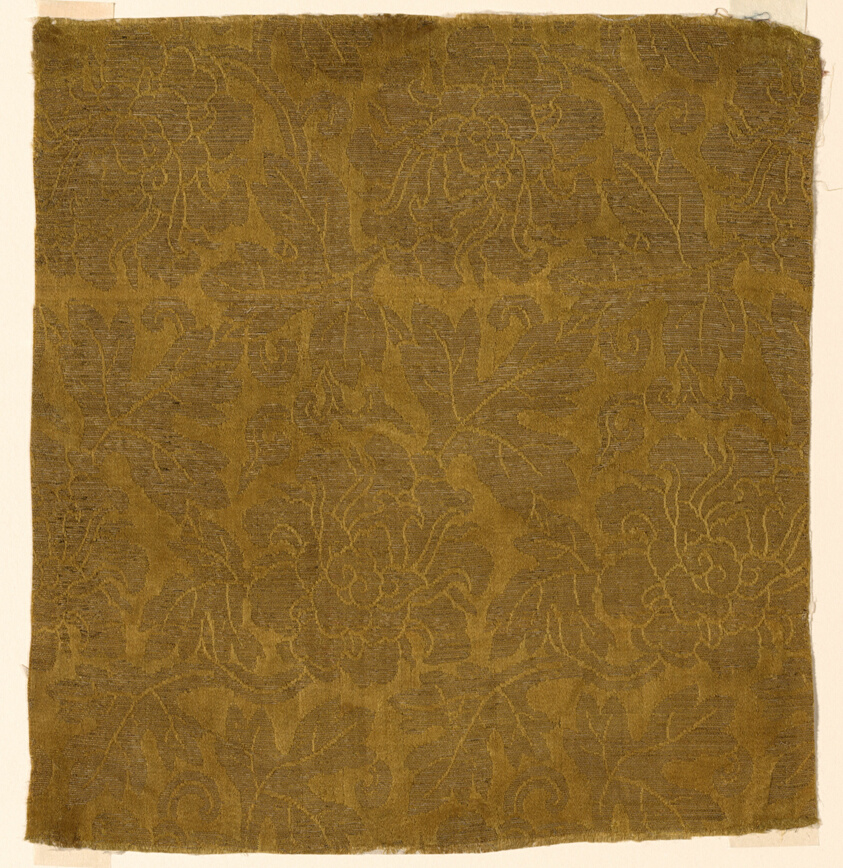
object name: Textile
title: Fragment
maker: Japan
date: 18th century, late Edo period (1789–1868)/ Meiji period (1868–1912)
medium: Brocade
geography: Japan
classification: textile; weaving